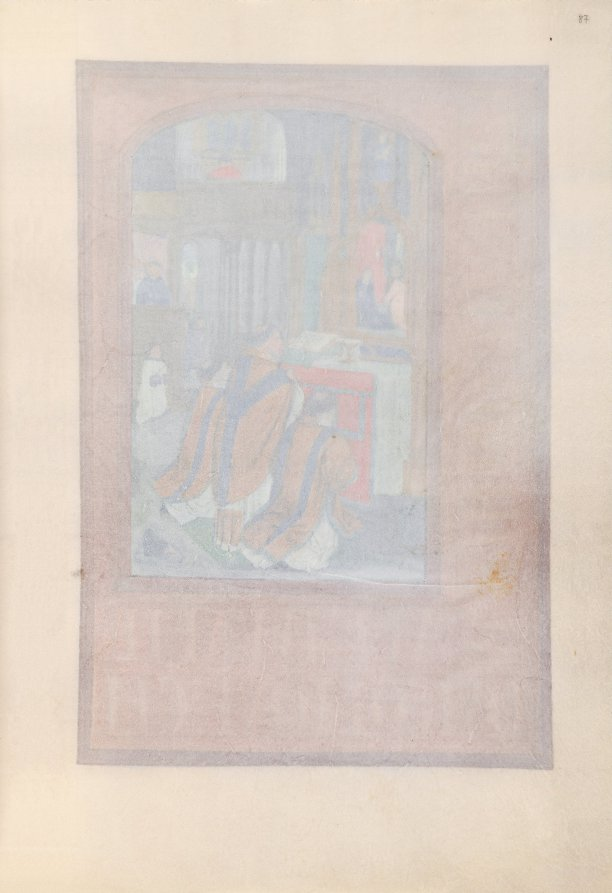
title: Hours of Queen Isabella the Catholic, Queen of Spain: Fol. 87r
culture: Flanders, Ghent and Bruges, late 15th century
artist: Master of the First Prayerbook of Maximillian (Flemish, c. 1444–1519)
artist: and Associates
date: c. 1500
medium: ink, tempera, and gold on vellum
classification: Bound Volume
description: This manuscript was illuminated by a circle of at least five highly organized manuscript painters active in the Flemish cities of Ghent and Bruges. The principal illuminator was Alexander Bening, who painted the majority of the book's miniatures. Manuscripts produced by this circle of artists are renowned for the decoration of their borders, which typically feature a rich variety of realistically-painted flowers, birds, and butterflies. This prayer book, called a book of hours, was intended not for a cleric, but for the private devotions of a lay person-in this case, Isabella the Catholic, Queen of Spain (1451-1504). Isabella's coat of arms embellishes the book's frontispiece. It is unlikely that the book was commissioned by the Queen herself; rather, she probably received it as a diplomatic gift from someone courting her patronage, perhaps Cardinal Francisco Jimenez de Cisneros. A Franciscan friar, Jimenez was dependent upon Isabella for his advancement, first to the post of Queen's confessor in 1492, and then to Archbishop of Toledo in 1495.